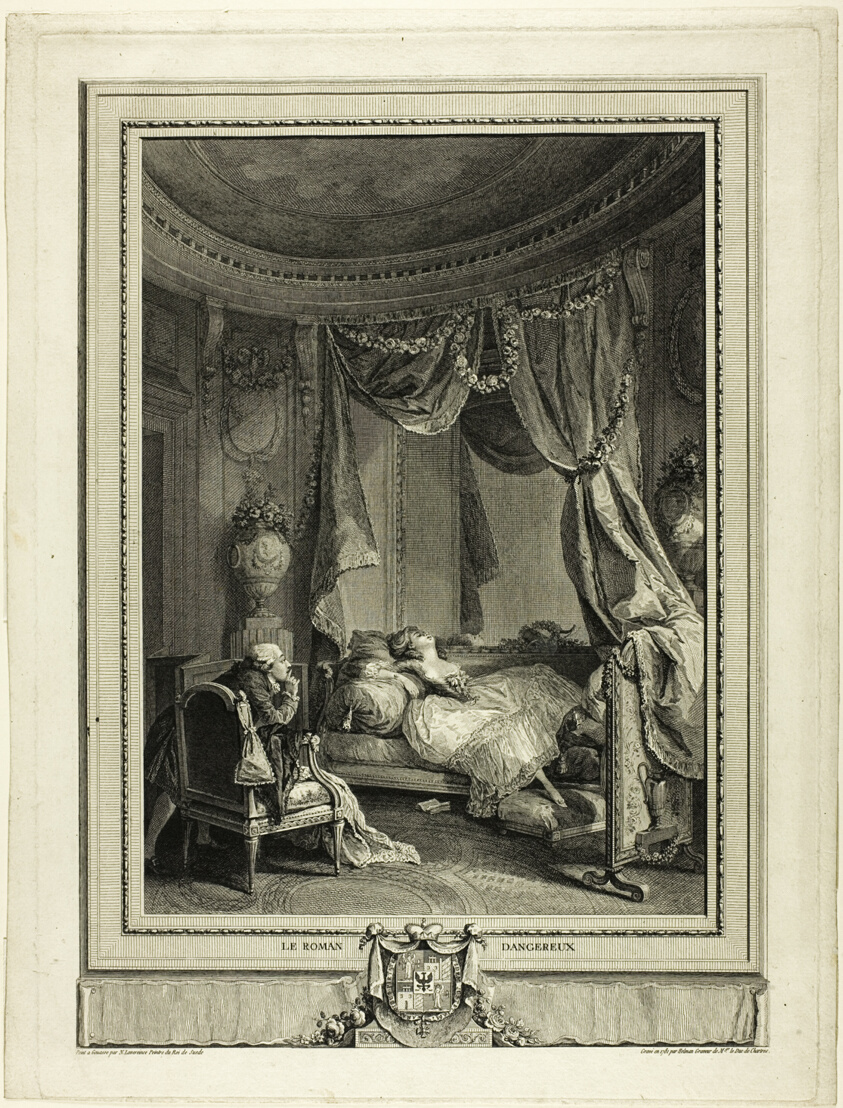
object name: Print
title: The Dangerous Novel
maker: Isidor-Stanislas Helman (French, 1743-1806 or 1809); after Nicolas Lavreince (Swedish, 1737-1807)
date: 1781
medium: Etching on paper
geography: France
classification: etching; print; prints and drawing